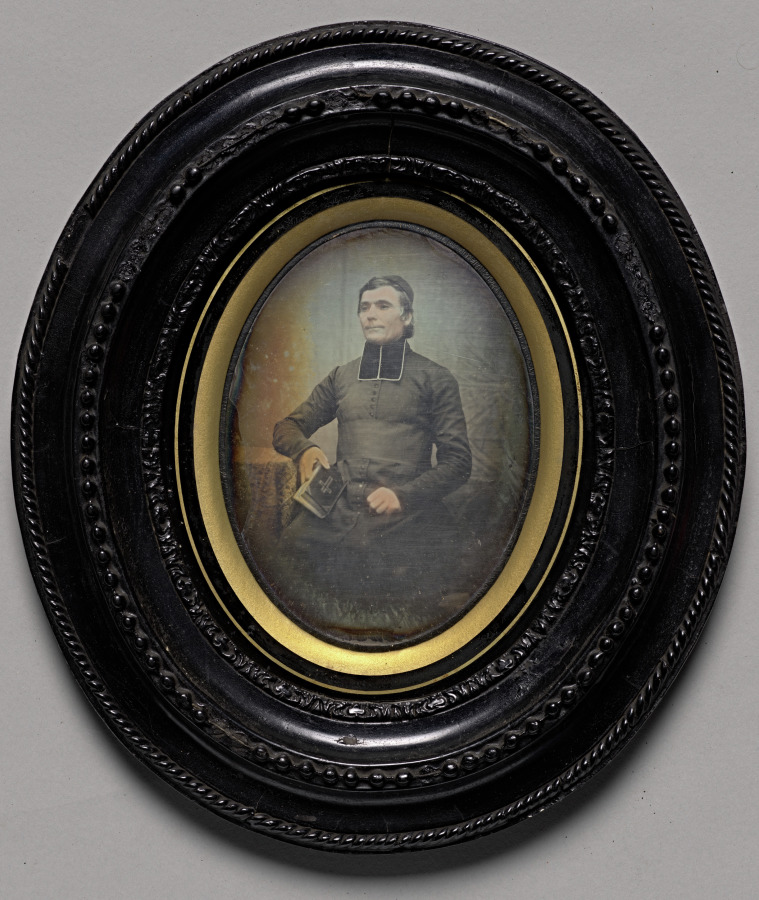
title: Priest, France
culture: France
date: c. 1840s–50s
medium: daguerreotype, half-plate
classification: Photograph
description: The daguerreotype was the first publicly available photographicprocess.Itwasinusefrom1839into the 1850s and especially favored for portraits. The daguerreotype’s mirrorlike surface offered incredible clarity and detail but the process only produced a unique image. It did not allow multiple copies to be produced.